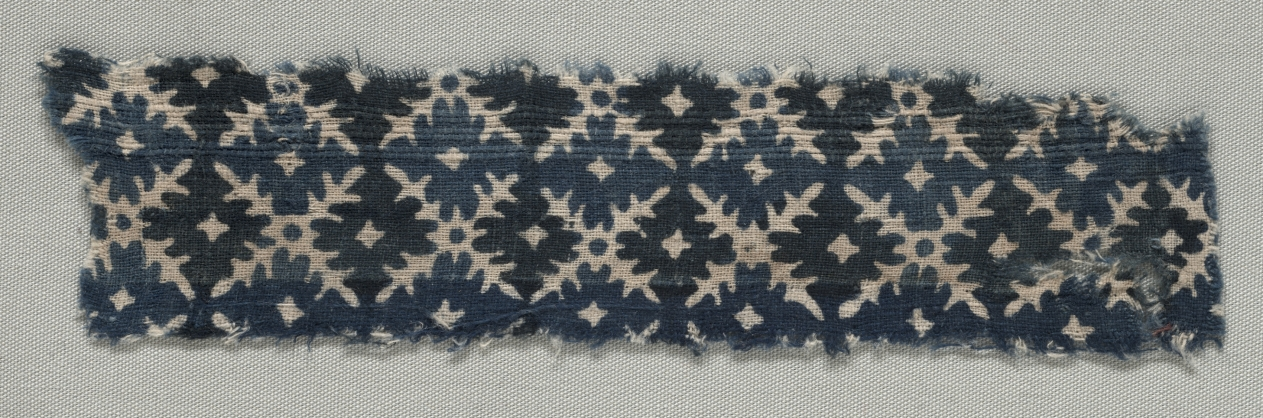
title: Fragment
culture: India, 12th-14th century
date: 1100s - 1300s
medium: plain cloth, resist dyed; cotton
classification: Textile